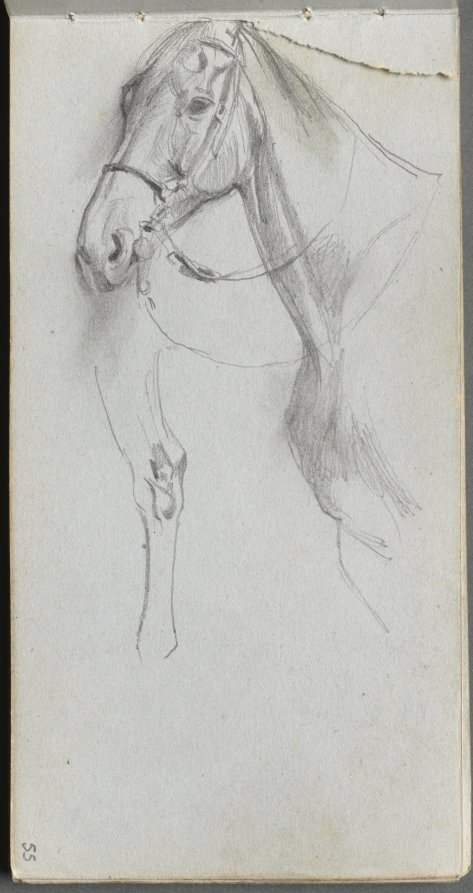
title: Sketchbook, page 55: Study for a Horse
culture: France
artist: Ernest Meissonier (French, 1815–1891)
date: c. 1860s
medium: graphite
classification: Bound Volume